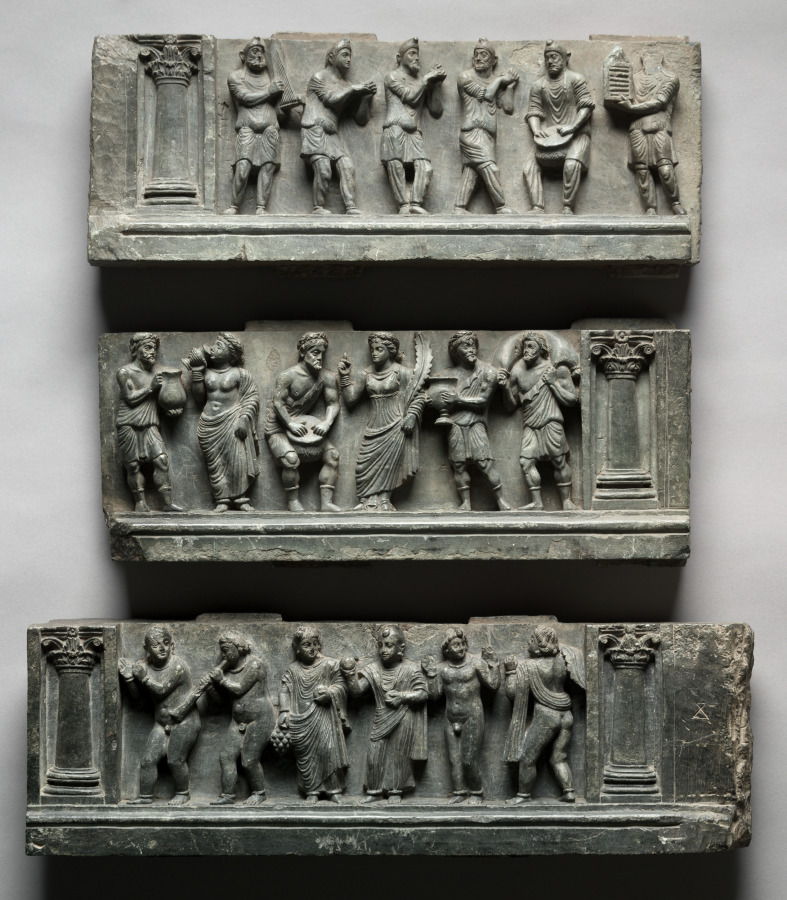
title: Foreigners and Non-Buddhists Drink, Dance, and Play Music, from a Buddhist Stupa Site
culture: Pakistan, Gandhara, Buner area, early Kushan period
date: c. 100 CE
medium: schist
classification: Sculpture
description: These three relief panels are from a group thought to have been used as ornamental stair risers at a Buddhist monument. They may have led up to a platform on which was established a stupa for veneration by followers of Buddhism. Phrygians with their trousers, tunics, and conical caps play music, dance, and clap, while Greek figures drink and carry wine. Naked figures and those wearing flowing robes and unusual hairstyles may be representatives of non-Buddhist sects, such as Jainism or the now defunct Ajivika religion. Bacchanalian scenes involving the ethnic and religious "other" were carved on the lower portions of public monuments in this multicultural region through which many international travelers passed during this time of heightened trade with the Mediterranean world.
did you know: Wine cups made of silver were also used as Buddhist reliquaries in this region.